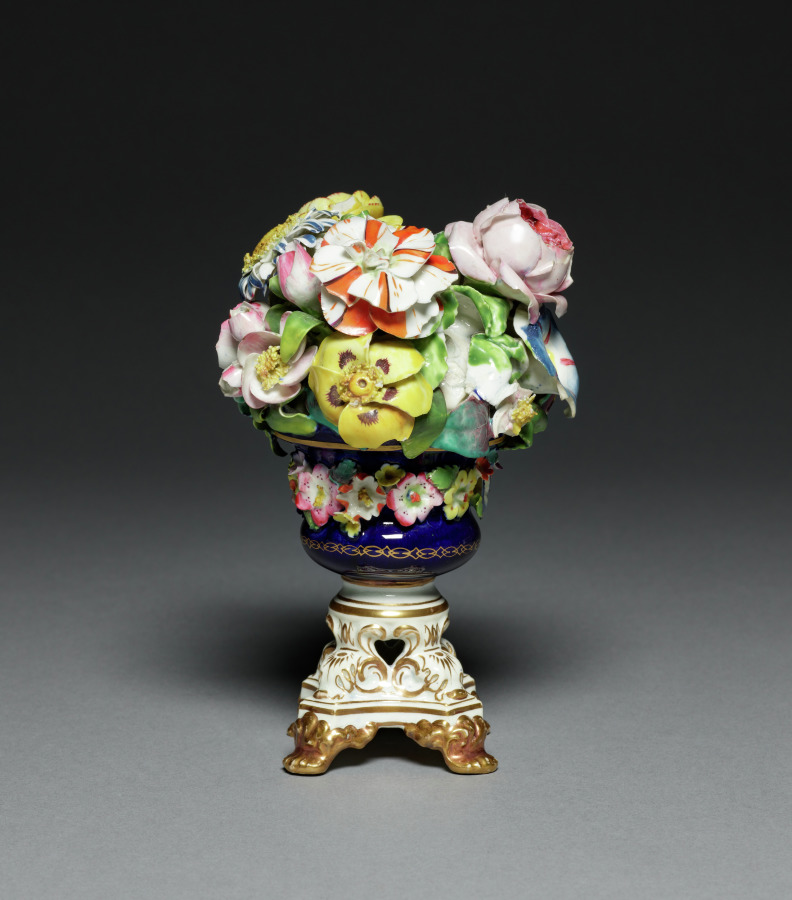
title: Flower Pot and Flowers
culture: England, Derby, 19th century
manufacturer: Derby Porcelain Factory (Bloor Period) (British)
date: 1811–1848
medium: artificial porcelain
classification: Ceramic